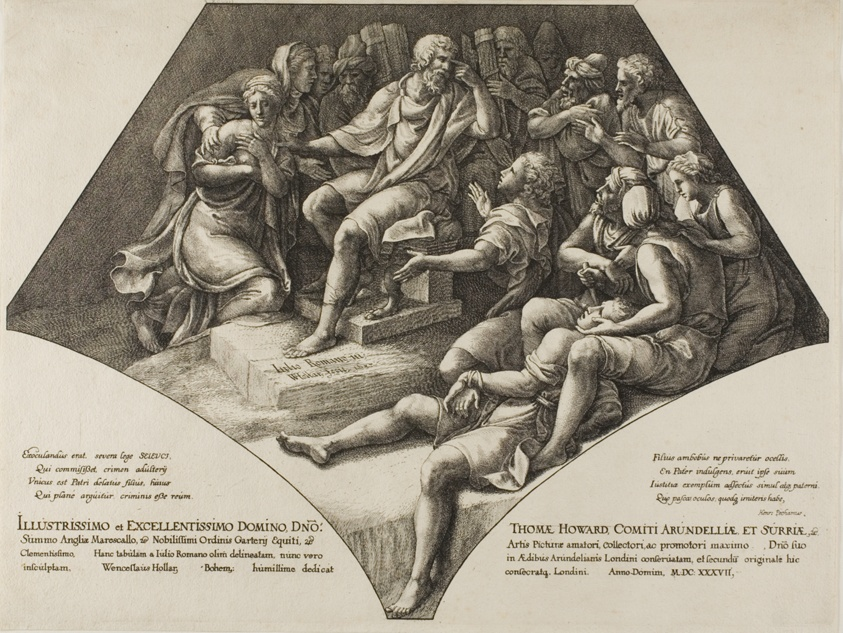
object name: Print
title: Seleucus and His Son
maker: Wenceslaus Hollar (Bohemian, 1607-1677); after Giulio Pippi, called Giulio Romano (Italian, c. 1499-1546)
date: 1637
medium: Etching on ivory laid paper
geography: Bohemia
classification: etching; print; prints and drawing